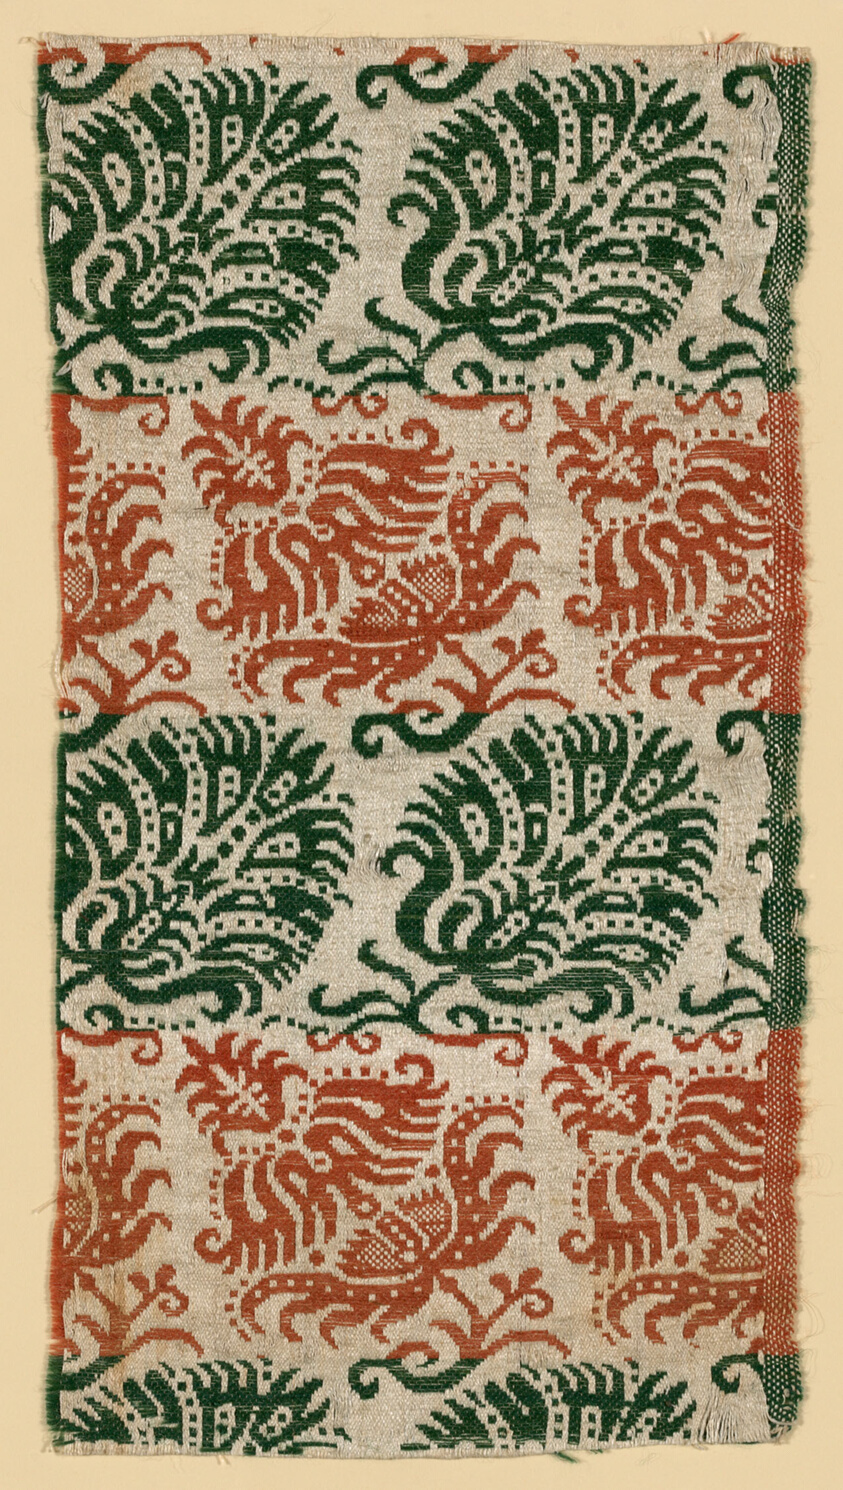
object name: Textile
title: Fragment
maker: Europe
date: 17th century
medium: Linen and wool, plain weave; tied and free double cloth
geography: Europe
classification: textile; weaving